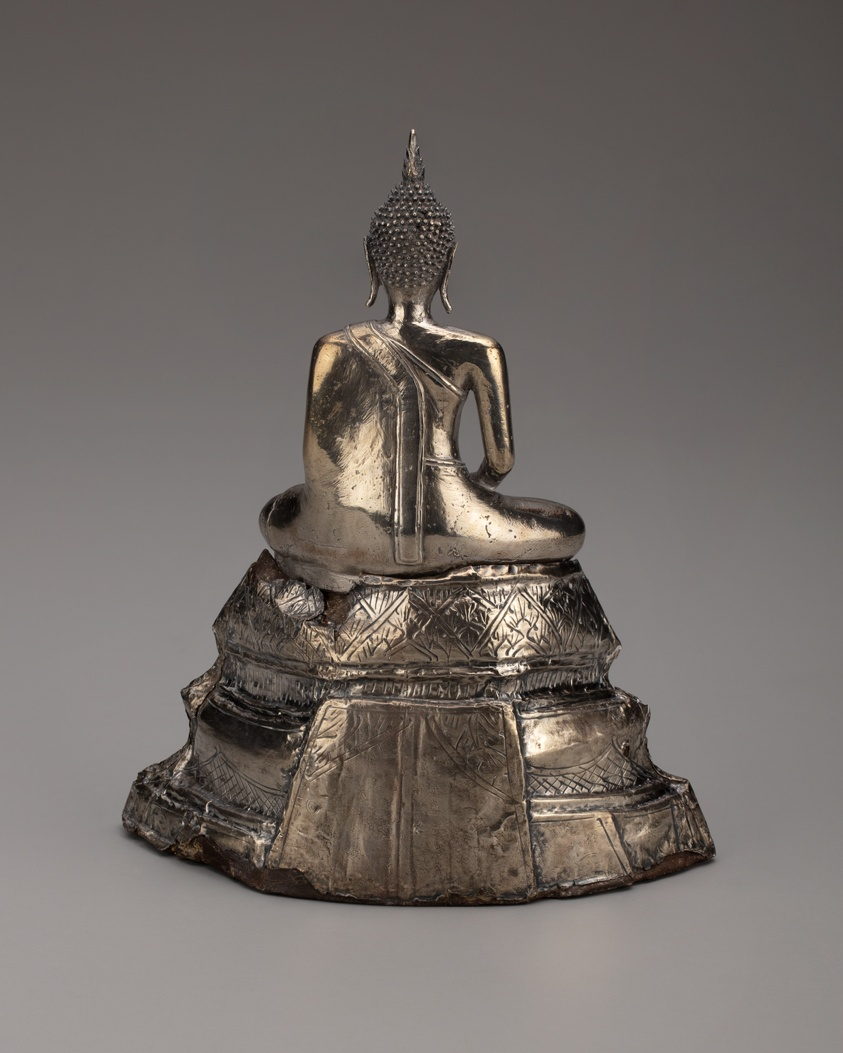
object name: Sculpture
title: Buddha Seated in Meditation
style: Southeast Asian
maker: Thailand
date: 19th century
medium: SIlver, cast with base worked in repoussé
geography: Thailand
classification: silver; metal; sculpture; asian art